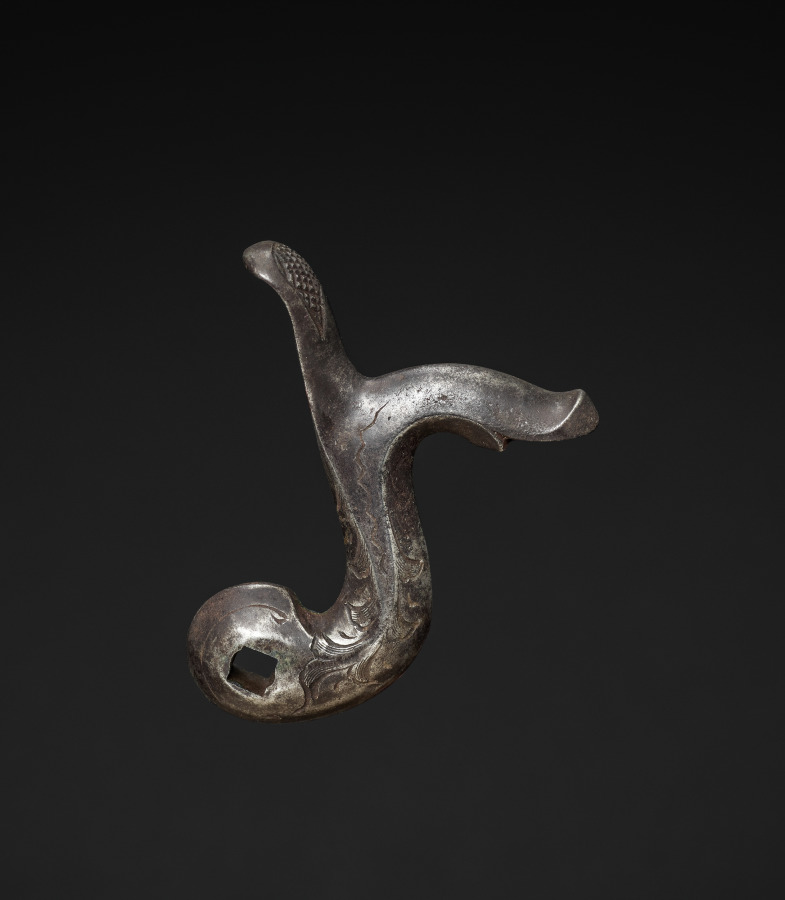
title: Gun-Lock Hammer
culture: England, early 19th century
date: c. 1800–1825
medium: steel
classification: Arms and Armor